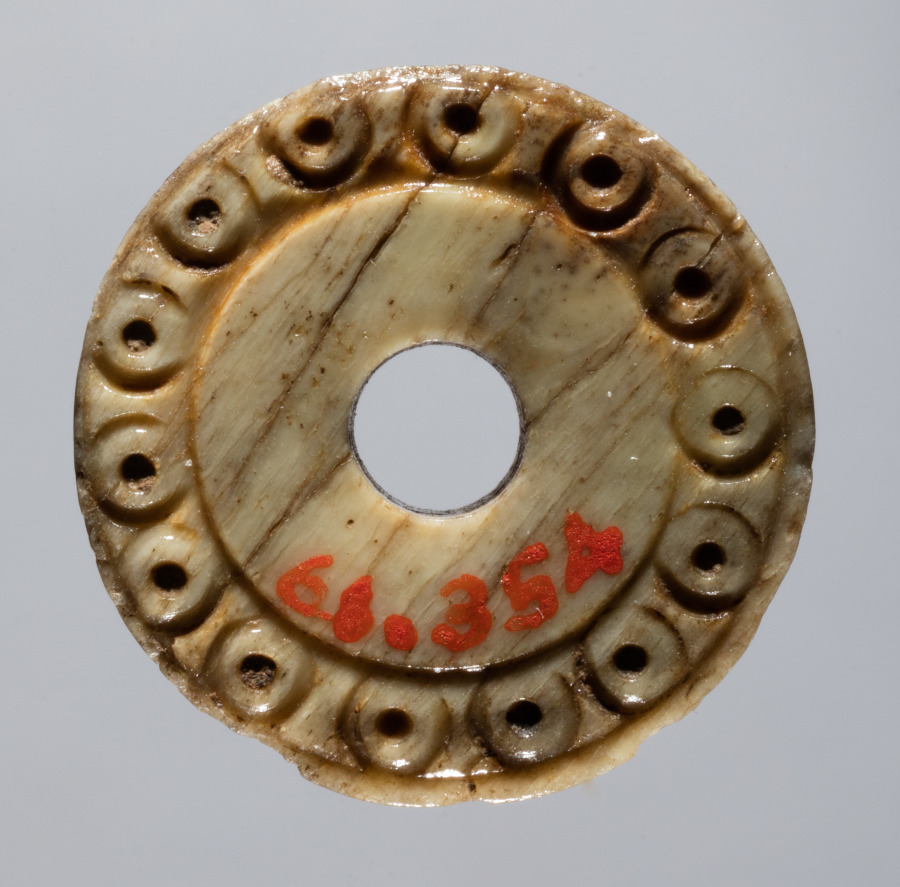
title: Spindle Whorl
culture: Iran, early Islamic period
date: 700s - 900s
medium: bone, incised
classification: Spindle Whorl